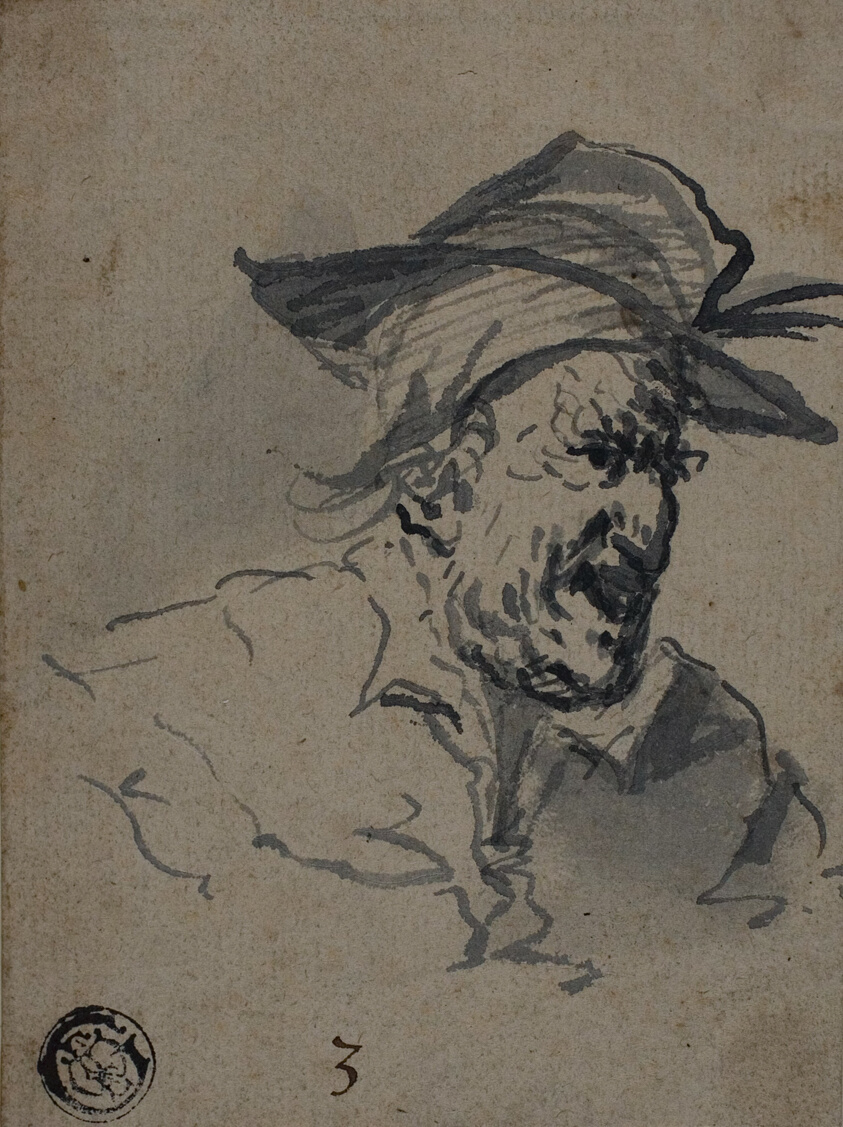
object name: Drawing and Watercolor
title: Character Sketch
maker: Possibly John Hamilton Mortimer (English, 1740-1779); or Francis Le Piper (English, 1640-1698)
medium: Pen and gray ink, with brush and wash, on cream laid paper, laid down on card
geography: England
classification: pen and ink drawings; drawings (visual works); prints and drawing